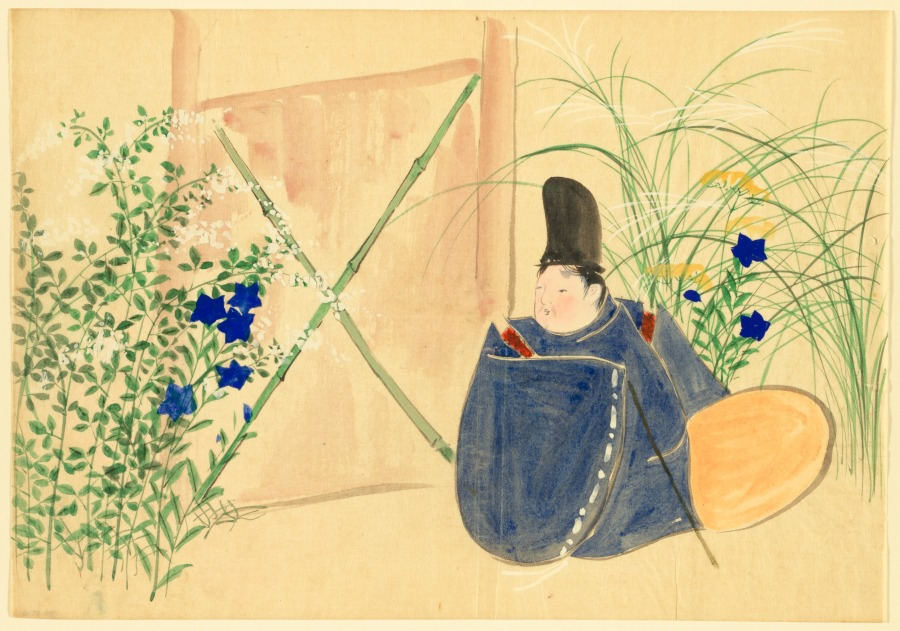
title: Flowers of a Hundred Worlds (Momoyogusa): Nakaguni (Nakaguni)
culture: Japan, Meiji period (1868–1912)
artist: Kamisaka Sekka (Japanese, 1866–1942)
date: 1909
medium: ink and color on paper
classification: Drawing